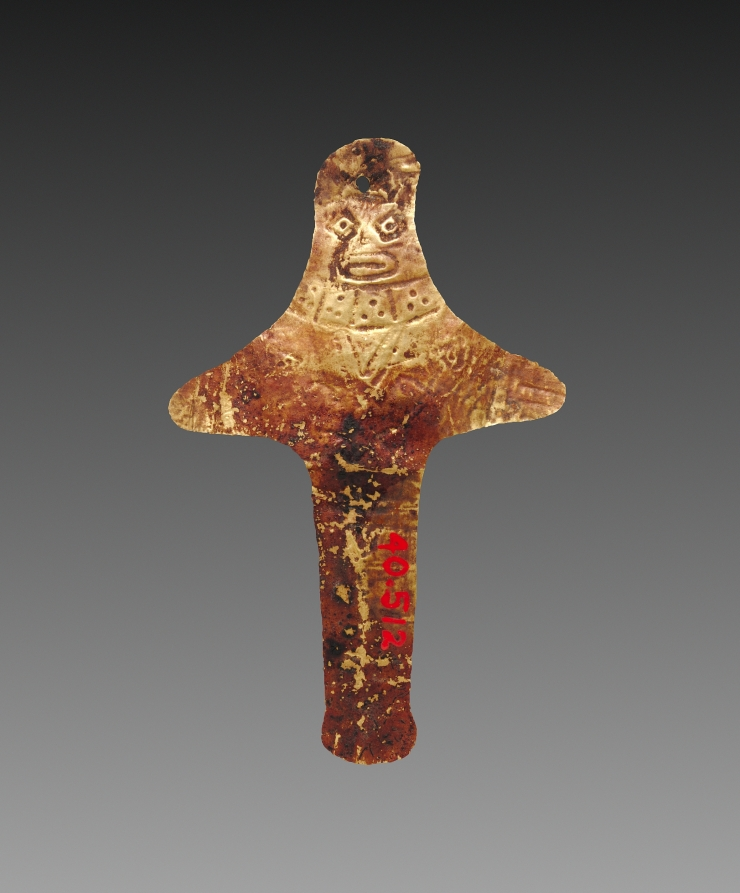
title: Figurine Plaque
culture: Peru, South Coast, Paracas, with modern etched enhancement(?)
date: c. 300 BCE–200 CE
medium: hammered and embossed gold-copper alloy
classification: Jewelry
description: This small metal ornament represents a human figure wearing a cap, a tunic decorated with bird images, and a necklace of orange-pink spondylus shell sections. Such necklaces are found in Paracas mummy bundles, and are frequently represented in Paracas embroidered images. Spondylus shell does not grow in the cold water off the coast of Peru, and had to be imported hundreds of miles from what is now Ecuador. Virtually all ancient Peruvian cultures treasured spondylus shell for its color and rarity, and as a symbol of fertility.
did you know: Tumbaga is an alloy made by blending gold with copper, which may give the gold a rosy hue.